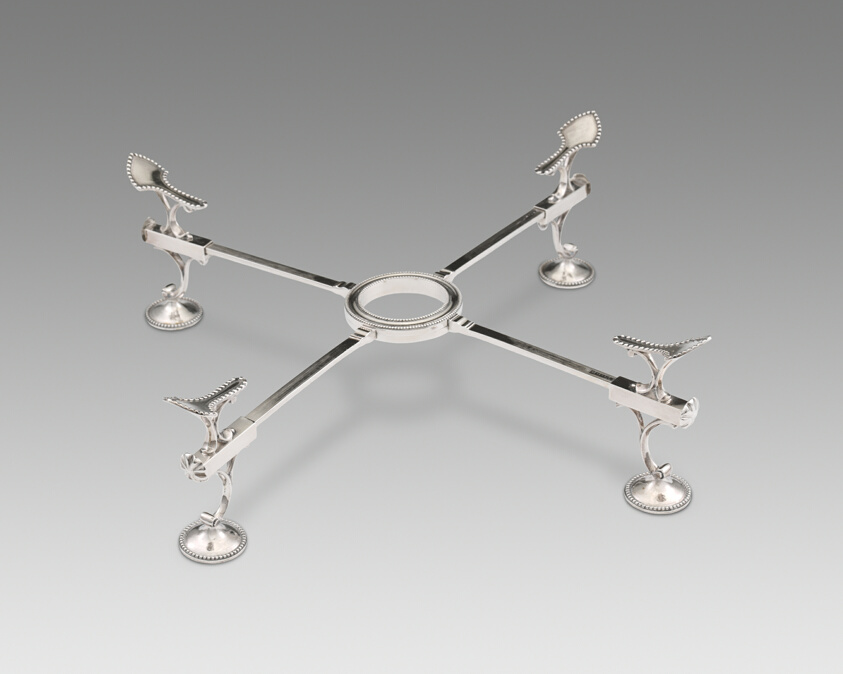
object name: Metalwork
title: Dish Cross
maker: Ephraim Brasher; American, 1744–1810; New York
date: 1790–1810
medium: Silver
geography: New York City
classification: tableware; silver; american decorative arts; american arts; decorative arts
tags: dining, drinking